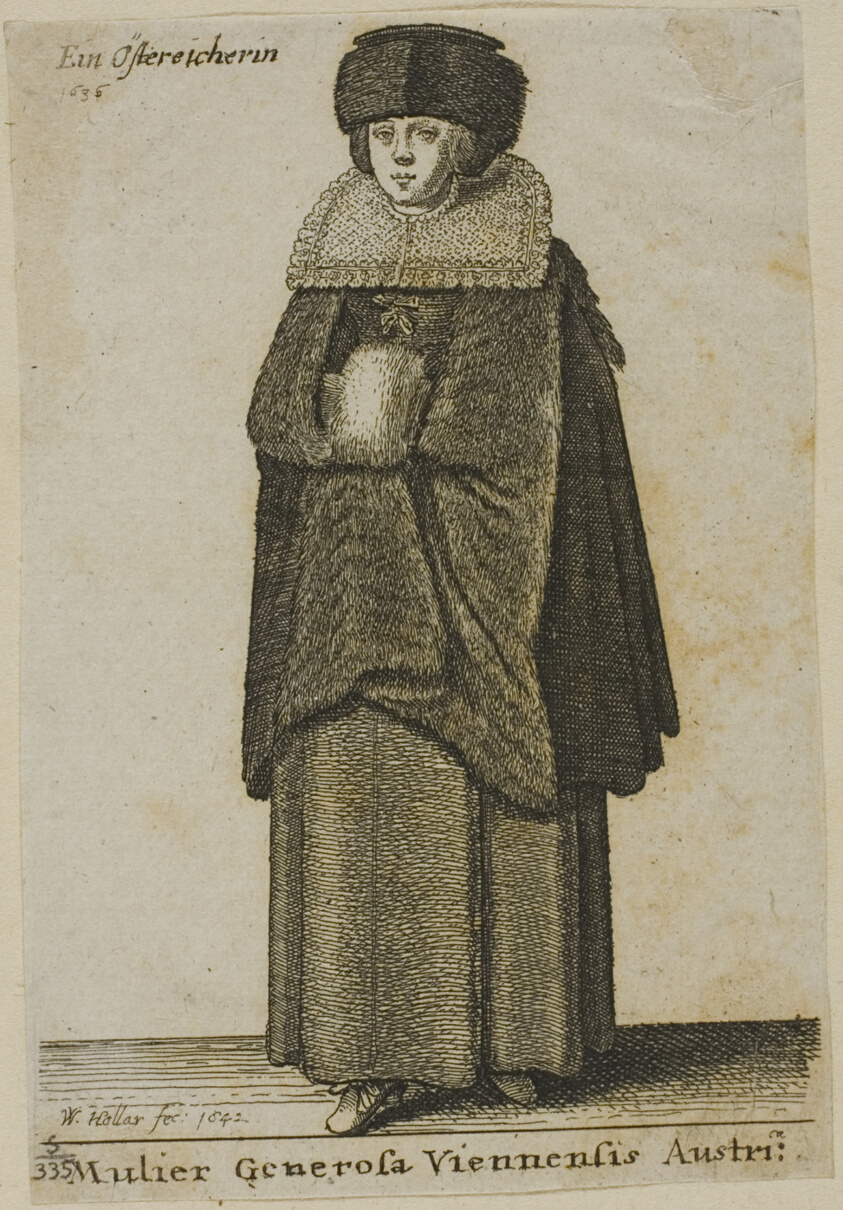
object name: Print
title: Woman from Vienna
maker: Wenceslaus Hollar (Bohemian, 1607-1677)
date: 1642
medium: Etching on gray Asian paper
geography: Bohemia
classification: etching; print; prints and drawing